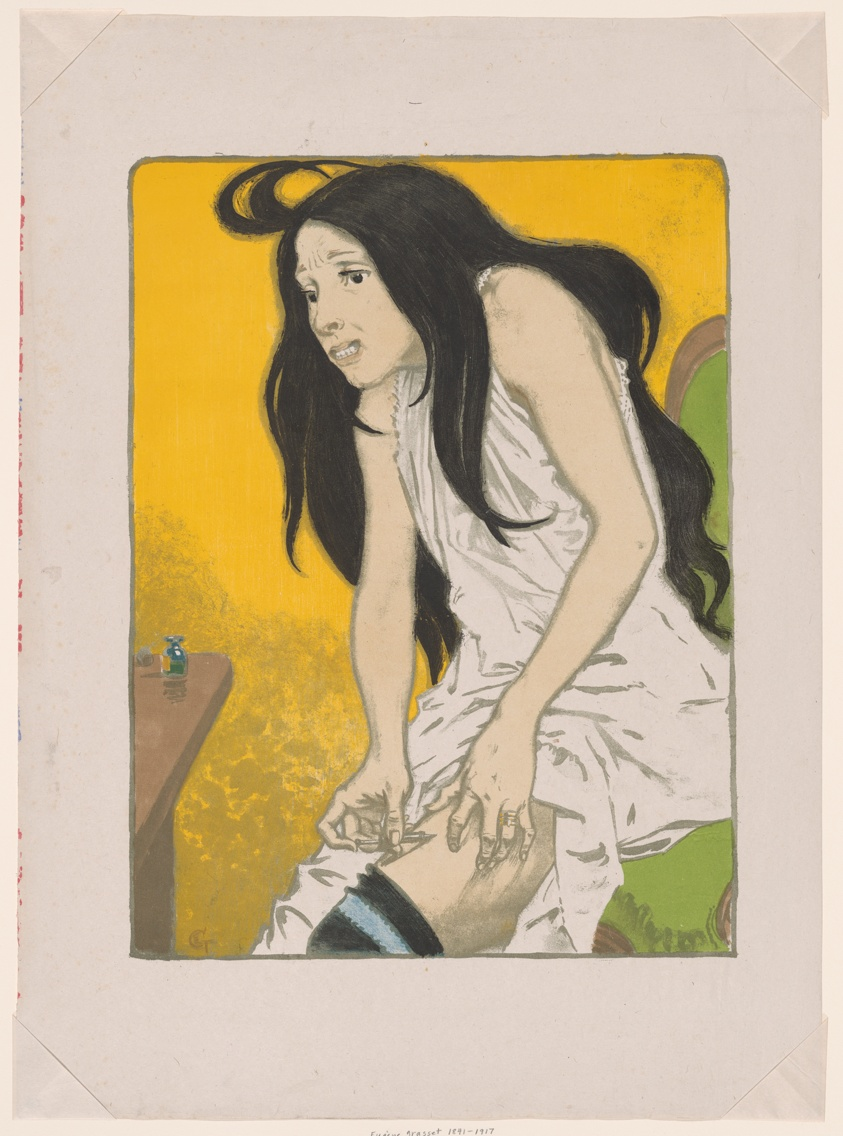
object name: Print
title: Morphine Addict, from The Album of Original Prints from Galerie Vollard (Morphinomaniac, from L'album d'estampes originales de la Galerie Vollard)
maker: Eugène Grasset (French, 1841–1917); printed by Auguste Clot (French, 1858–1936); published by Ambroise Vollard (French, 1867–1939)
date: 1897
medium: Color lithograph on off-white wove paper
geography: France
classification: print; lithograph; paper; prints and drawing